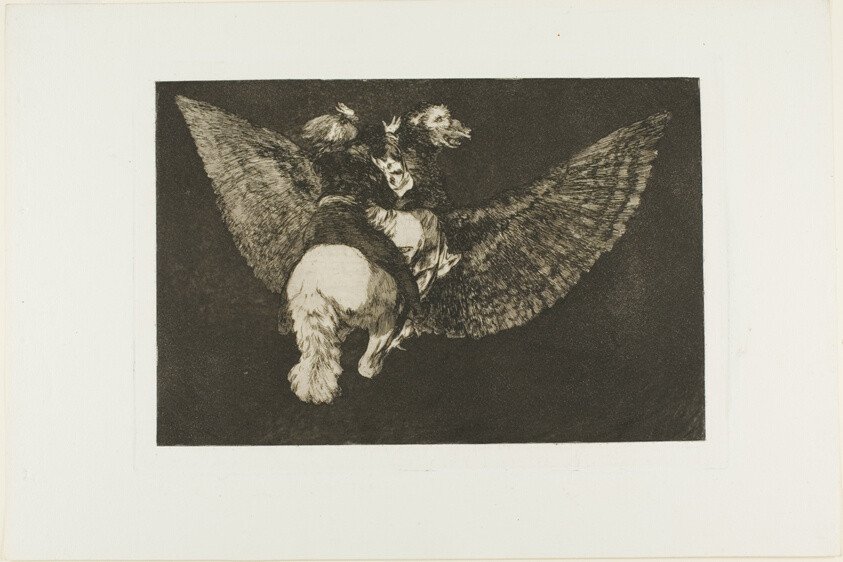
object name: Print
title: Renounce the Friend Who Covers You with His Wings and Bites You with His Beak, plate five from Los Proverbios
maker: Francisco José de Goya y Lucientes (Spanish, 1746-1828)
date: 1815/24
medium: Etching and aquatint on ivory wove paper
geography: Spain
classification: etching; print; prints and drawing